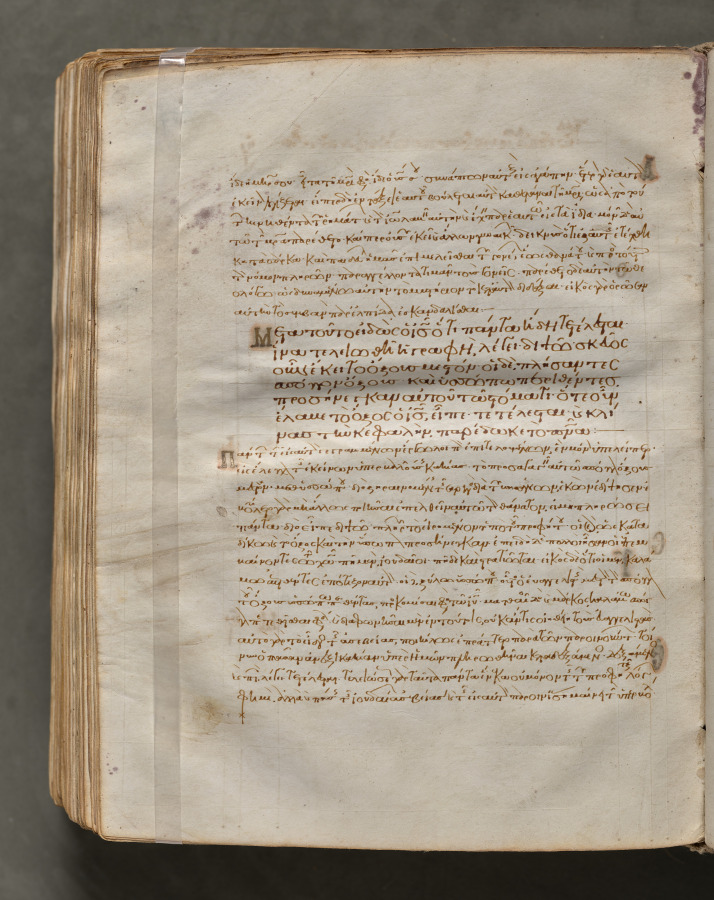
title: Text, folio 415 (verso), from a Gospel Book with Commentaries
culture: Byzantium, Constantinople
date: c. 1000–1100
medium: ink, tempera, and gold on vellum; leather binding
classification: Bound Volume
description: Each of the four gospels in this book opens on a page with brilliantly illuminated borders depicting the author of the text as well as birds—principally peacocks, symbols of the immortality of the soul—and fountains, representing the fountain of life and the salvation of the soul. This volume consists of 428 leaves with texts in Greek. Its level of sophistication suggests that it was probably written and decorated in a monastery in Constantinople.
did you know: Gospel books were carried in procession through Byzantine churches.